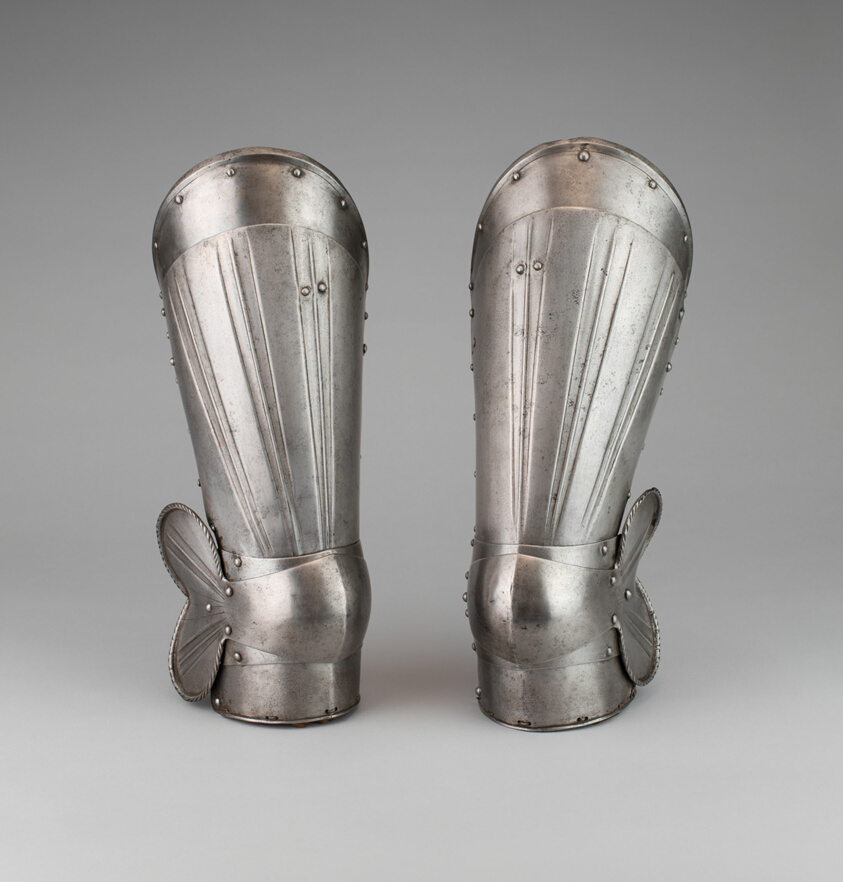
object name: Armor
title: Pair of Cuisses and Poleyns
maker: Southern German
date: c. 1510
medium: Steel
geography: Germany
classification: suit-element; armor; arms and armor